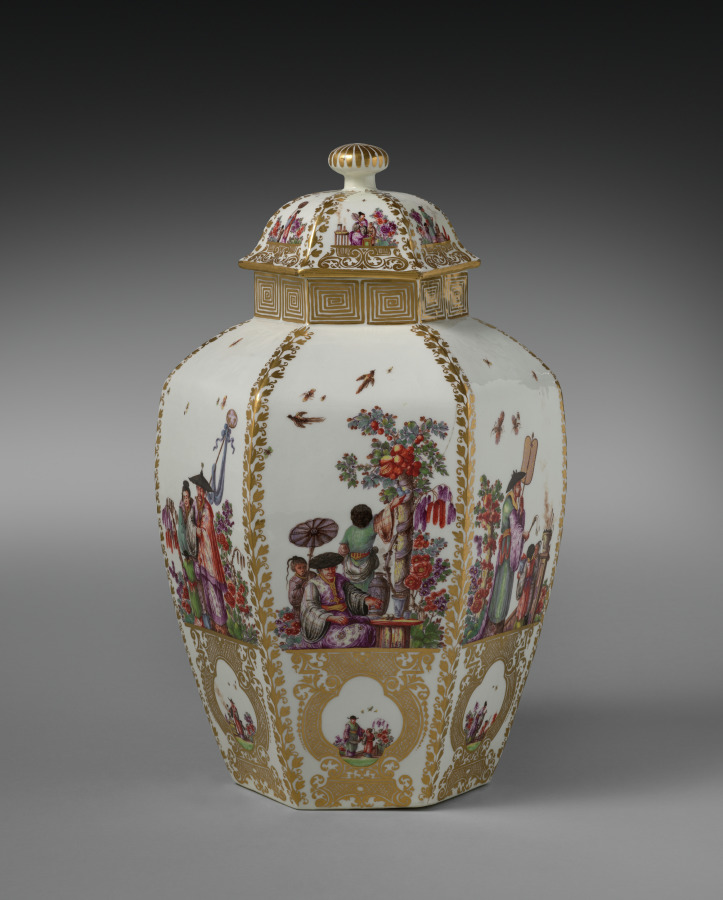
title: Covered Vase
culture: Germany, Meissen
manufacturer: Meissen Porcelain Factory (German, est. c. 1710)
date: c. 1728–30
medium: porcelain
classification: Ceramic